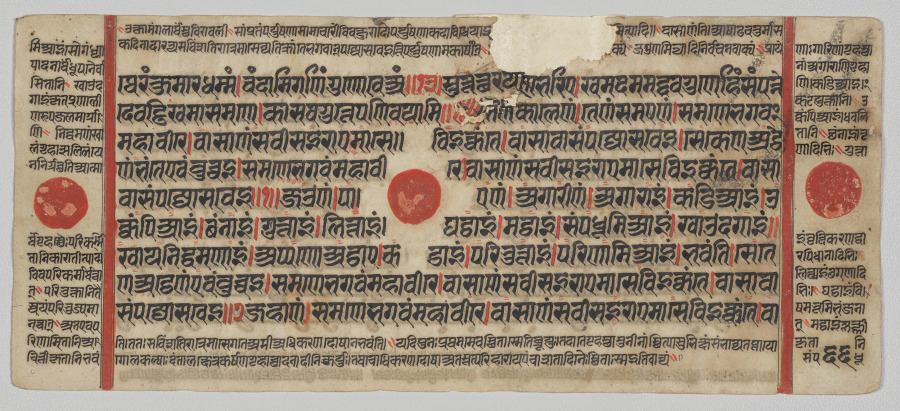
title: Text, Folio 66 (verso), from a Kalpa-sutra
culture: Western India, Gujarat, last quarter of the 15th century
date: c. 1475–1500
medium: Gum tempera, ink, and gold on paper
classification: Painting